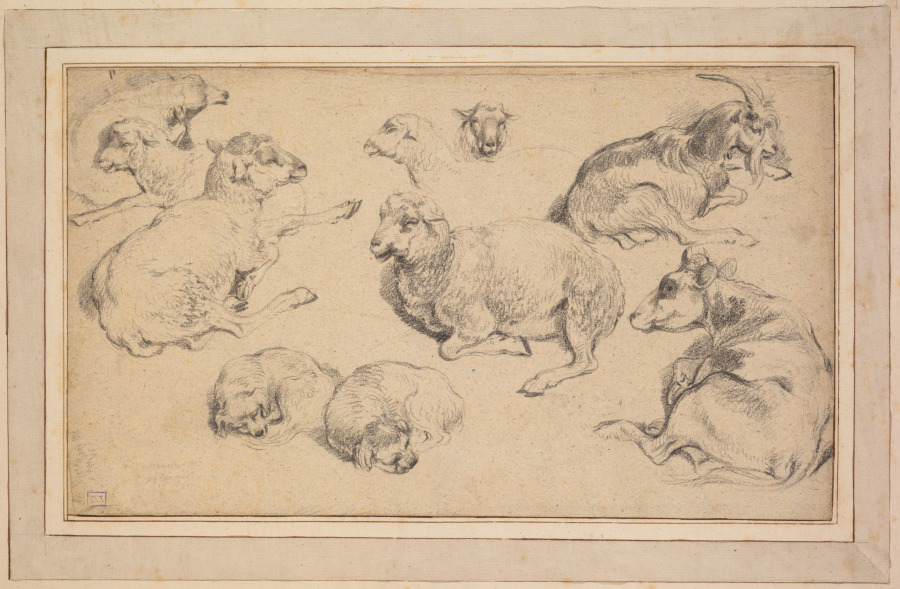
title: Sheet of Studies with Sheep, Goats, and Dogs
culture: France, 18th century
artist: Jean-Baptiste Marie Hüet (French, 1745–1811)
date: c. 1780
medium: Black chalk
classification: Drawing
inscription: Verso, center, in black ink: W.H.S. Verso, lower left, in graphite: Vente Sotheby Londres / 1.8.1928 / no. 5 Verso, in brown ink: L. 239 / 2nd Day (?) Verso, upper margin, in black chalk: 68